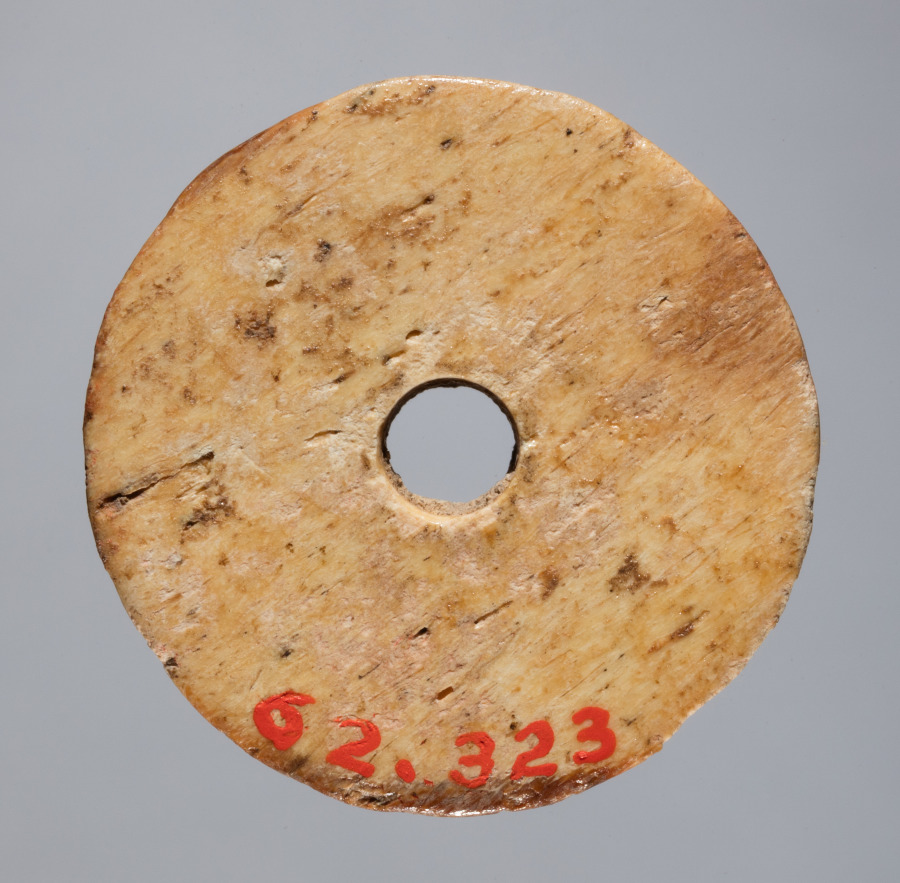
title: Spindle Whorl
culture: Iran, early Islamic period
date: 700s - 900s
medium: bone, incised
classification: Spindle Whorl